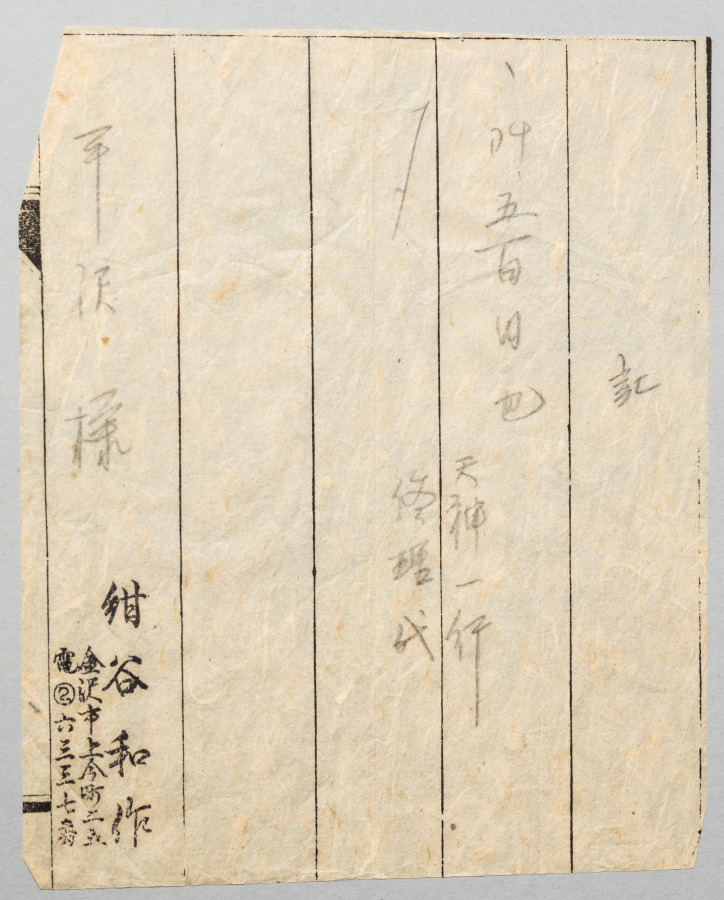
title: Sacred Name of Tenjin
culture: Japan, Muromachi period (1392–1573)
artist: Sakugen Shūryō (Japanese, 1501–1579)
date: 1500s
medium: hanging scroll; ink on paper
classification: Calligraphy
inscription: signed: signature unread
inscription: Sealed: Sakugen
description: The story emerged in the early 1300s that the kami Tenjin had traveled to China and achieved enlightenment under a famous Buddhist meditation master. Paintings of the subject as well as written invocations of Tenjin’s name were highly valued by the monks of Japan’s Zen Buddhist communities, to which an invocation of Tenjin’s name brushed by Zen monk Sakugen Shūryō attests. Sakugen was both a poet and an official envoy to Ming China in the 1500s. Creating calligraphies of deities’ names was akin to painting religious icons.